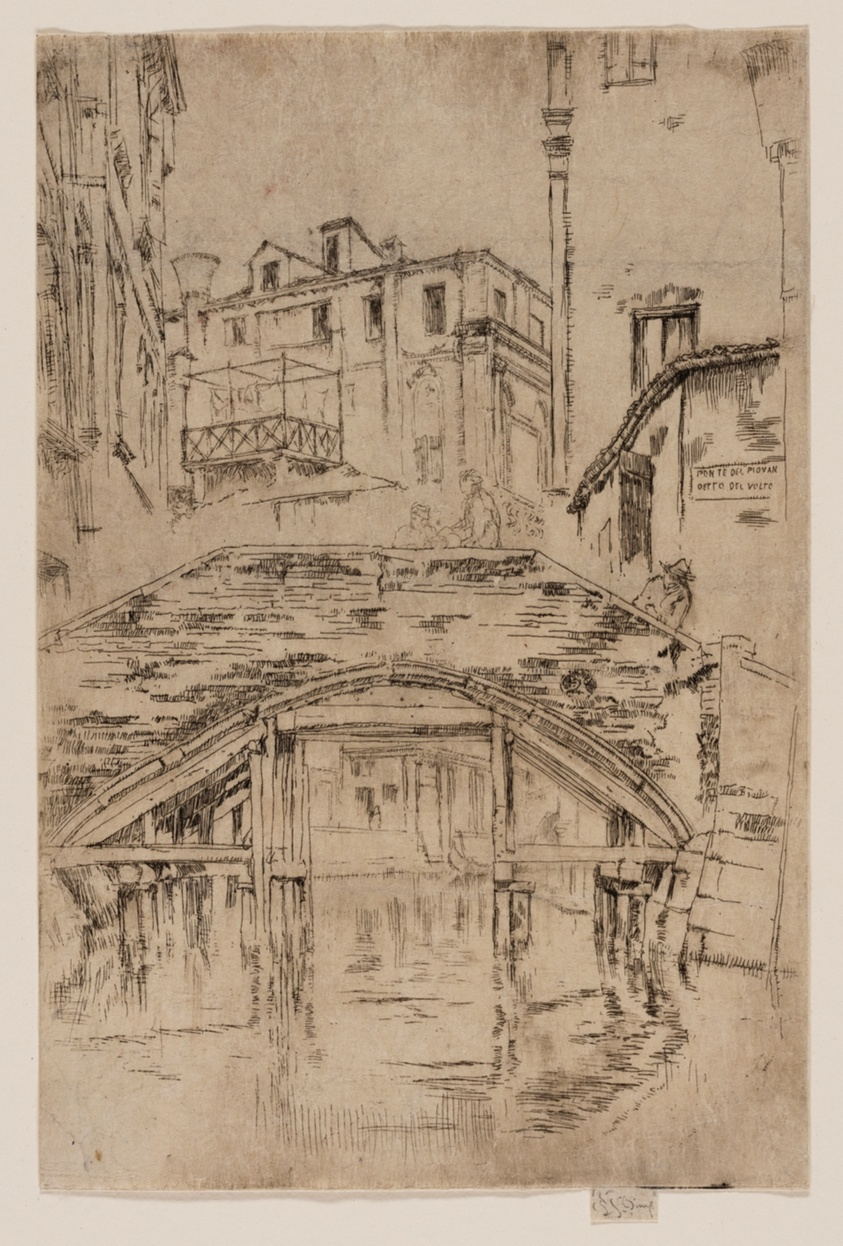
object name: Print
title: Ponte del Piovan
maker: James McNeill Whistler (American, 1834-1903)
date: 1879/80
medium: Etching and drypoint in black ink on off-white Japanese paper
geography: United States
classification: etching; drypoint; print; prints and drawing; paper